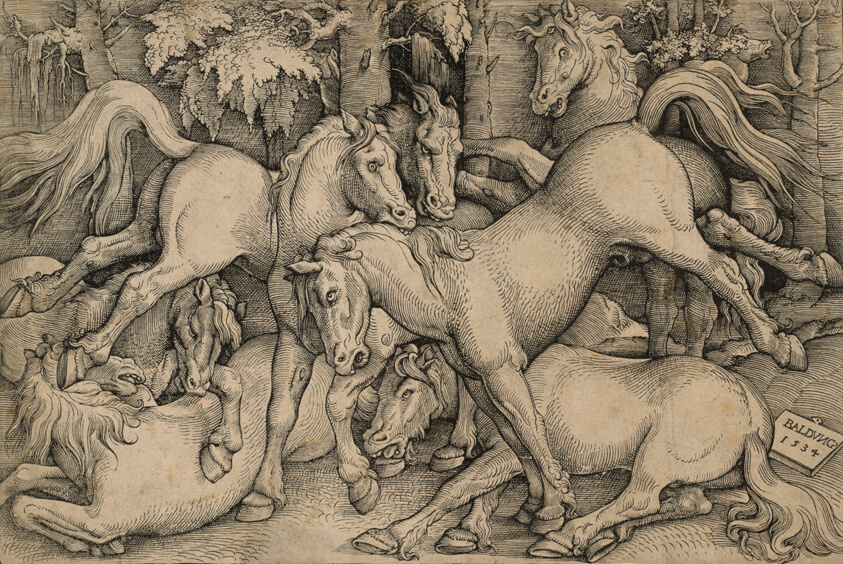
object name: Print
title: Wild Horses Fighting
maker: Hans Baldung Grien (German, 1484/85-1545)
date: 1534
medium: Woodcut in black on tan laid paper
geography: Germany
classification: woodcut; print; prints and drawing